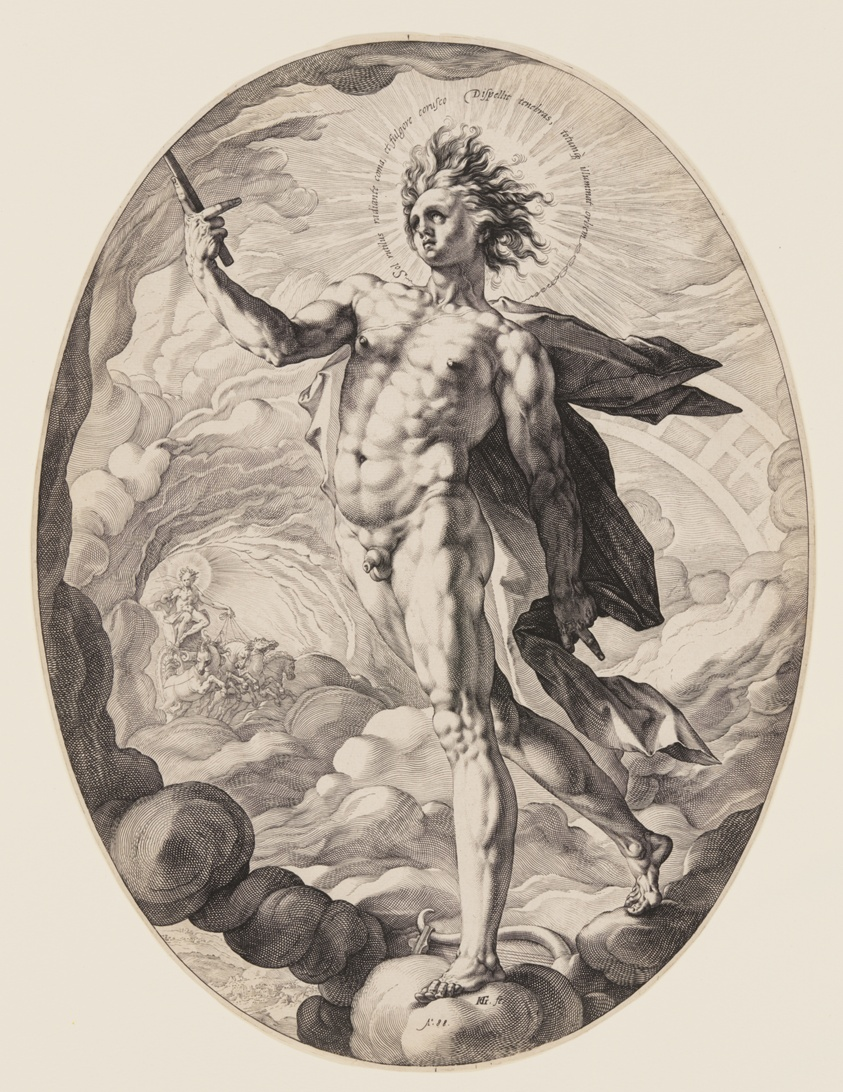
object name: Print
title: Apollo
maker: Hendrick Goltzius (Dutch, 1558–1617)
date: 1588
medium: Engraving on ivory laid paper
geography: Netherlands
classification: engraving; paper; print; prints and drawing